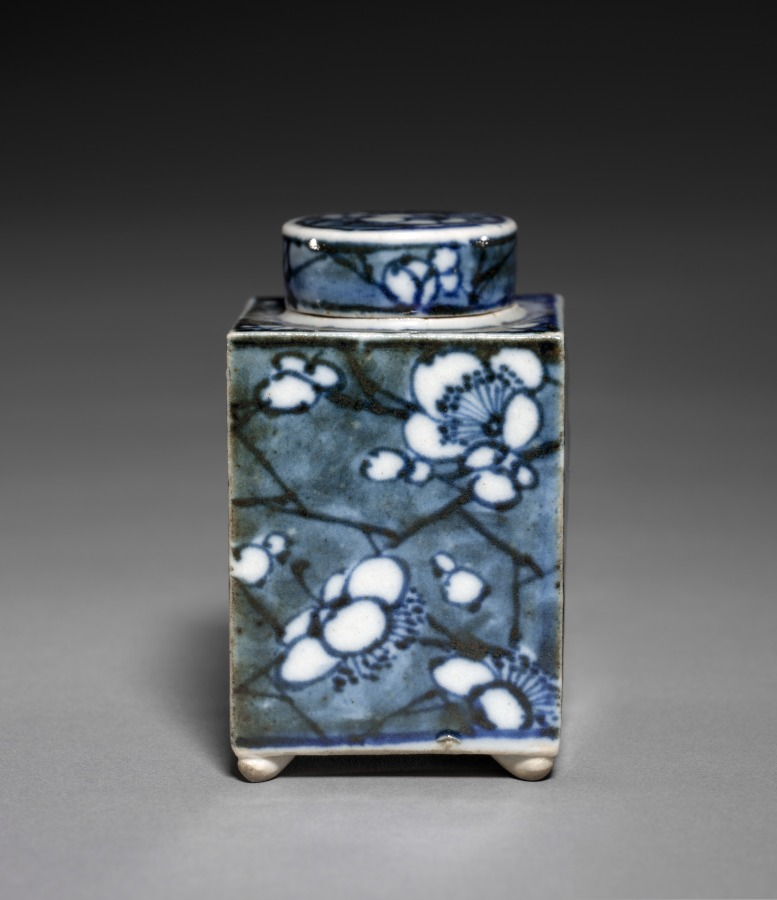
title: Pair of Tea Containers with Plum Blossoms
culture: Japan, Edo period (1615–1868)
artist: Aoki Mokubei (Japanese, 1767–1833)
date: early 1800s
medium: porcelain with underglaze blue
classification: Ceramic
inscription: signed "Ro Mokubei" on base in underglaze blue.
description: Aoki Mokubei, born into a family of restaurateurs, was a potter, calligrapher, painter, and scholar, and is considered one of the three masters of later Edo period Kyoto ceramics. He specialized in porcelains fashioned after Chinese prototypes, and created works for steeped tea (sencha) such as these matching tea caddies decorated in an underglaze blue called sometsuke—literally “with applied dye.” He signed them on their bottoms. They also have intricately patterned silk sleeves to both beautify and protect them. On the exterior of the lid of the outer wooden box that contains them, it is written that Mokubei inscribed and painted an image on the box. On the interior of the lid, the signature and seals of a former owner are written. Mokubei has signed the lid of the inner box, and a charming ink and light color composition of West Lake in Hangzhou in China covers its three sides. On the fourth side is a long inscription by Mokubei describing the scene.